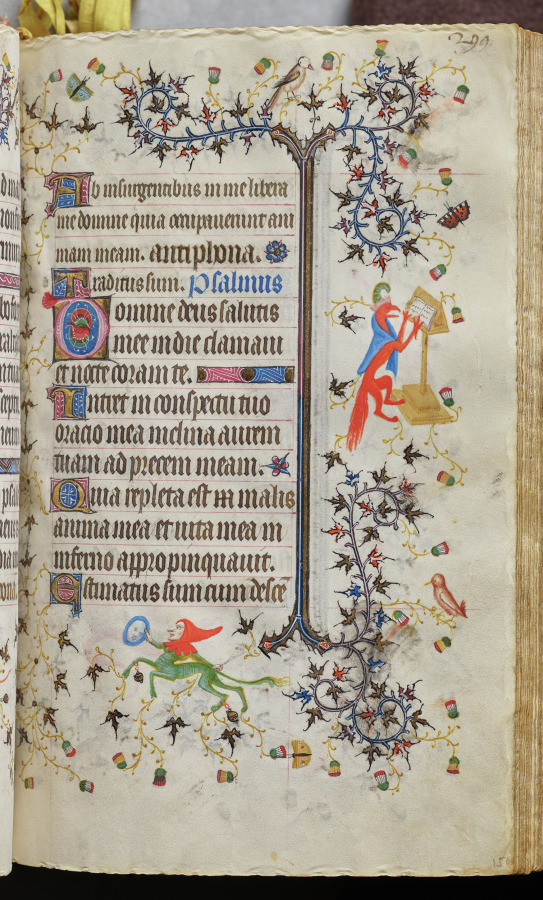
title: Hours of Charles the Noble, King of Navarre (1361-1425): fol. 150r, Text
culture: France, Paris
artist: Master of the Brussels Initials and Associates (French)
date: c. 1405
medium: ink, tempera, and gold on vellum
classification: Bound Volume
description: This precious volume was obviously highly prized by its owner, the French-born King of Navarre, who had his coat of arms painted on no less than twenty folios. Rather than directly commissioning this manuscript from a specific workshop, it seems that Charles the Noble acquired his book of hours -- perhaps ready-made for the luxury market -- while on a trip to Paris in 1404-05. A collaborative effort, six painting styles are evidenced within the pages of this codex, those of two Italians, two Frenchmen, and two Netherlanders. The painter who was responsible for the planning and decoration of the book, and who produced seventeen of the large miniatures, was a Bolognese artist known as the Master of the Brussels Initials. His principal assistant, responsible for most of the borders, was a Florentine who signed his name "Zecho" da Firenze on folio 208 verso.